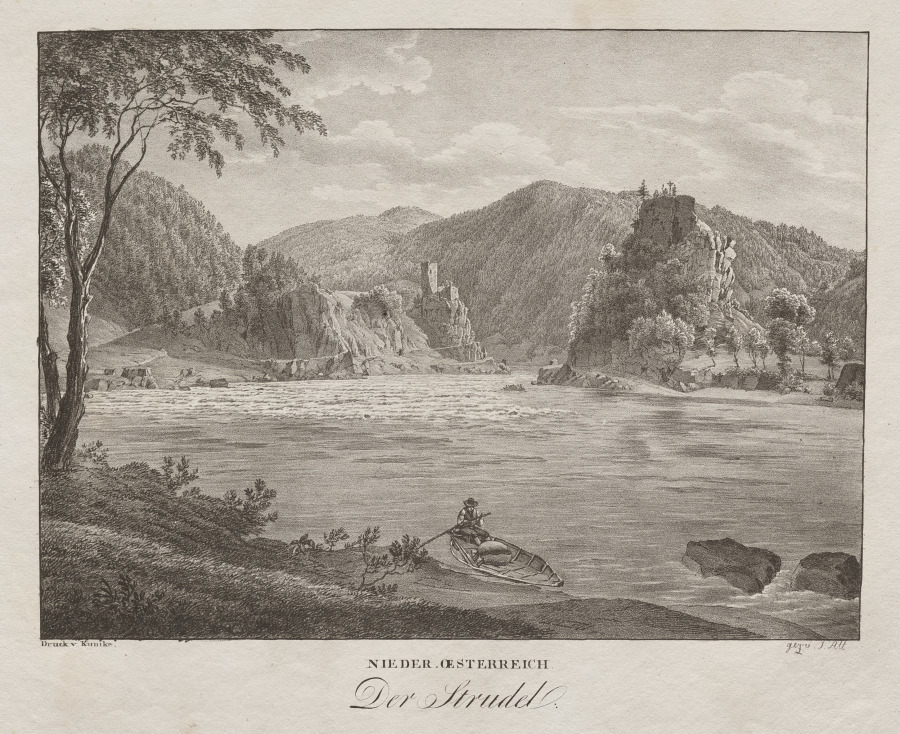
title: Nieder-oesterreich, Der Strudel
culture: Austria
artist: Jakob Alt (Austrian, 1789–1872)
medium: lithograph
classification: Print